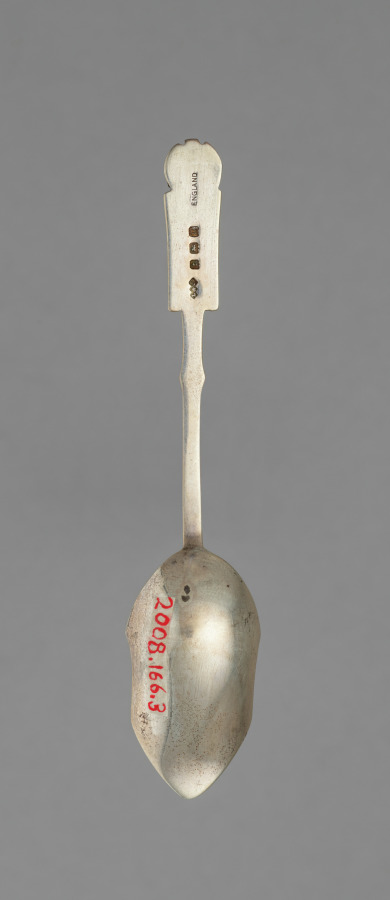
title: Set of six Spoons in Original Box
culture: England, London, 19th century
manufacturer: Liberty and Company (British)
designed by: attributed to Archibald Knox (British, 1864–1933)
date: c. 1895–1910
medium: Silver, enamel decoration and leather box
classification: Silver